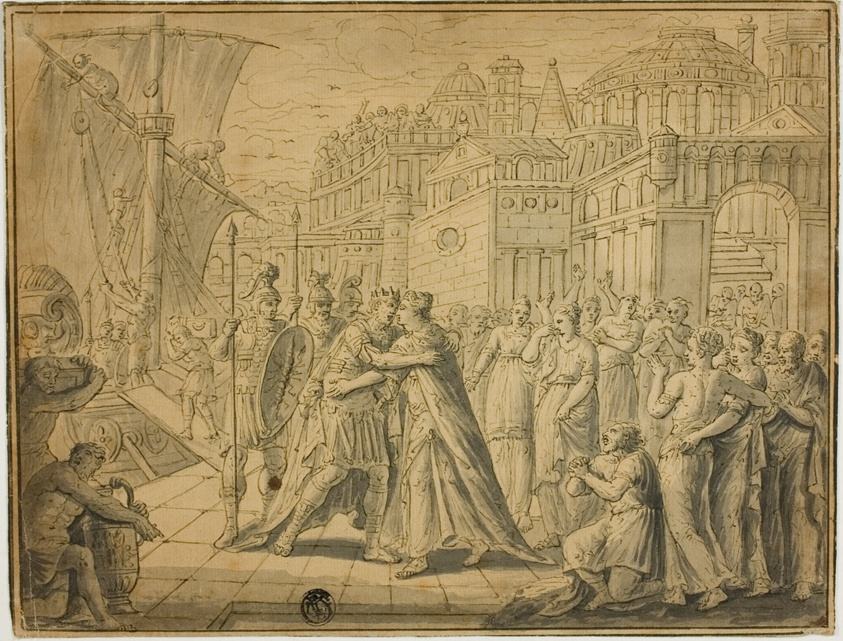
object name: Drawing and Watercolor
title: Dido and Aeneas Embracing before Gates of Carthage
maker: Possibly after Marten de Vos (Flemish, 1532-1603); or François Boitard (French, c. 1670-c. 1715); or Philibert Benoît Delarue (French, 1718-1780)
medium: Pen and black ink, with brush and gray wash, on tan laid paper, laid down on fabric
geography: Flanders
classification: pen and ink drawings; drawings (visual works); prints and drawing